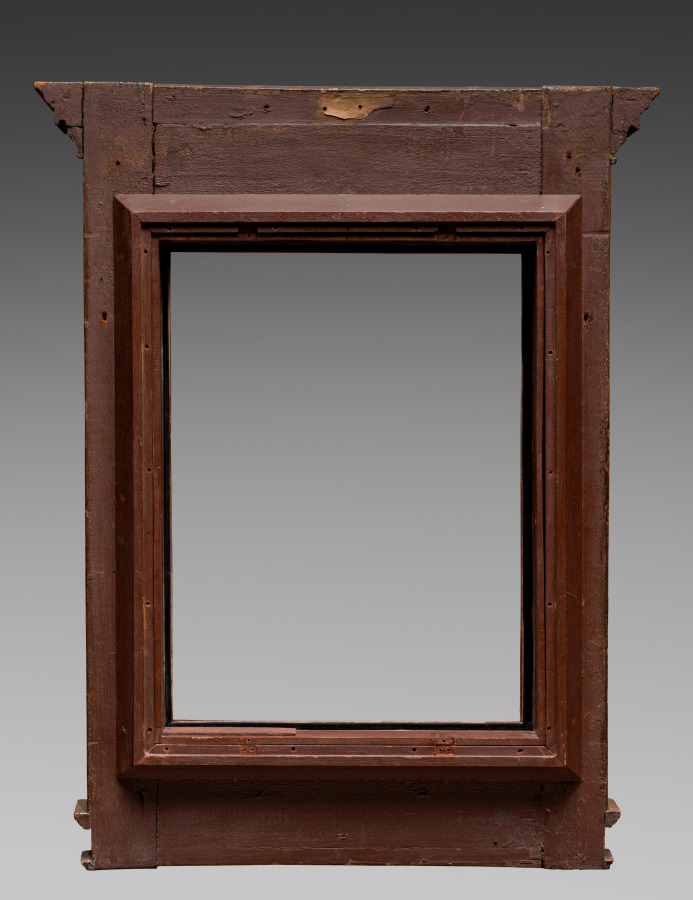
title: Virgin and Child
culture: Italy, late 15th Century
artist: Pintoricchio (Italian, c. 1454–1513)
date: c. 1490–1500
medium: tempera and oil on wood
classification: Painting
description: Bernardino di Betto, called Pinturicchio, is said to have acquired his nickname ("little painter") because of his small stature, and used it to sign some of his paintings. Born in Perugia, the provincial capital of Umbria, he trained under local artists, eventually becoming a paid assistant of the painter Perugino. He is known to have assisted Perugino on his frescoes in the Sistine Chapel and eventually established his own reputation as a respected artist. Many of his commissions were for churches and wealthy families in Umbria and elsewhere. Though the source of this painting is unknown, it was likely produced for a home or private chapel.